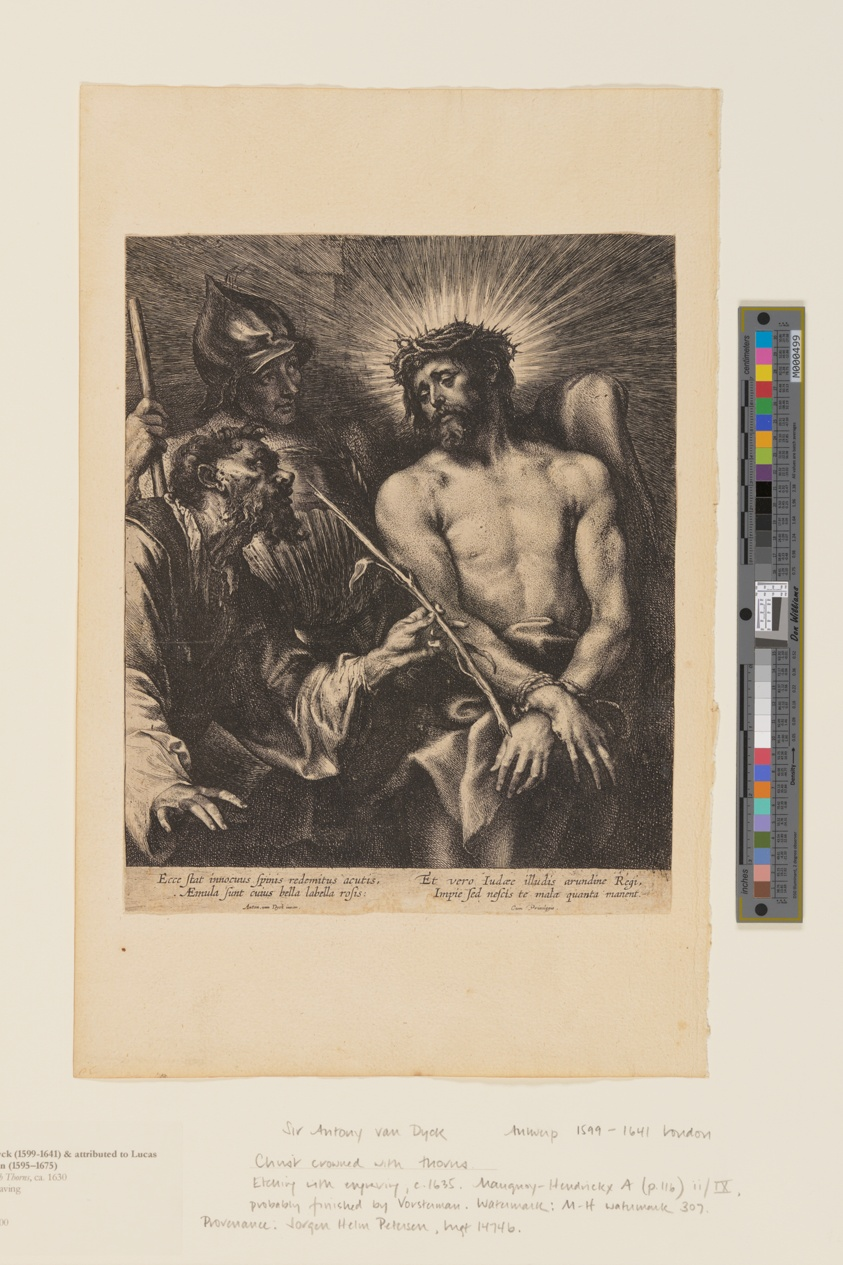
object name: Print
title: Christ Crowned with Thorns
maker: Anthony van Dyck (Flemish, 1599–1641)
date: c. 1630-40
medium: Etching on ivory laid paper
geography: Flanders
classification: print; paper; prints and drawing; etching